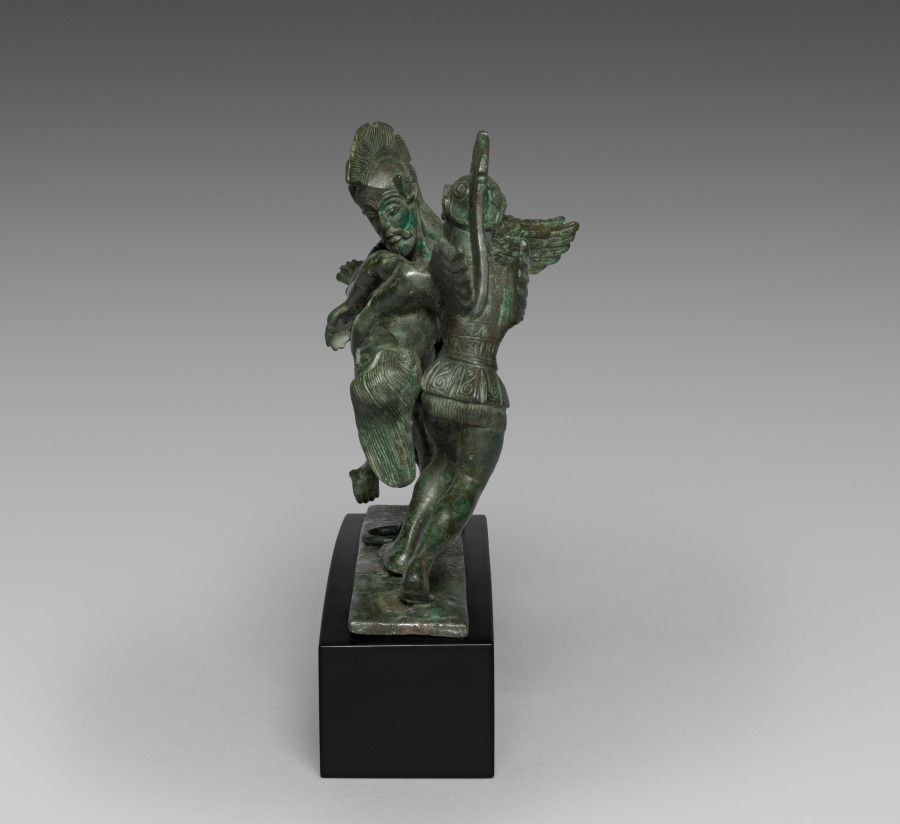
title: Sleep and Death Cista Handle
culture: Etruscan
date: 400–375 BCE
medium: bronze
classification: Sculpture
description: Designed for attachment to the lid of a large bronze cista, a cylindrical lidded box, these three figures probably represent Sleep (Hypnos) and Death (Thanatos) holding the body of Sarpedon. A son of Zeus who helped to defend Troy from invading Greek forces, "godlike Sarpedon of the brazen helmet" fell at the hands of Patroclus, as told by Homer in Book XVI of the Iliad. Apollo then intervened to protect the body, removing it from danger and entrusting it to the two winged deities, as depicted here and in a number of other ancient artworks, Greek and Etruscan alike. If not Sarpedon, the fallen warrior could be Memnon, the son of Eos and Tithonos slain by Achilles.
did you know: These three figures were cast in eight separate pieces, then welded together and attached to the rectangular base.